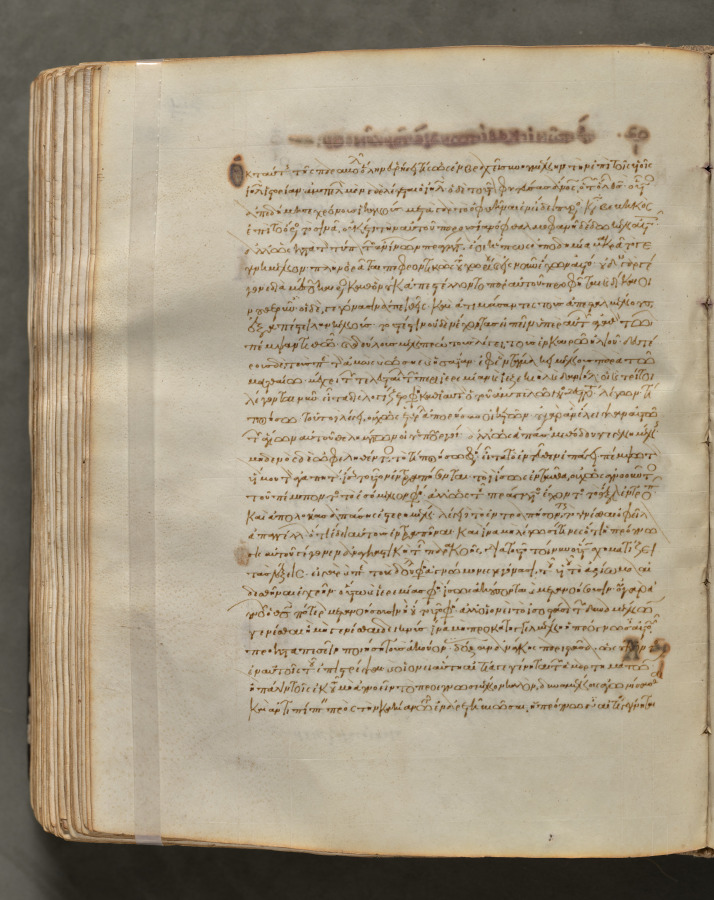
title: Text, folio 300 (verso), from a Gospel Book with Commentaries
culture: Byzantium, Constantinople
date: c. 1000–1100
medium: ink, tempera, and gold on vellum; leather binding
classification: Bound Volume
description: Each of the four gospels in this book opens on a page with brilliantly illuminated borders depicting the author of the text as well as birds—principally peacocks, symbols of the immortality of the soul—and fountains, representing the fountain of life and the salvation of the soul. This volume consists of 428 leaves with texts in Greek. Its level of sophistication suggests that it was probably written and decorated in a monastery in Constantinople.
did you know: Gospel books were carried in procession through Byzantine churches.